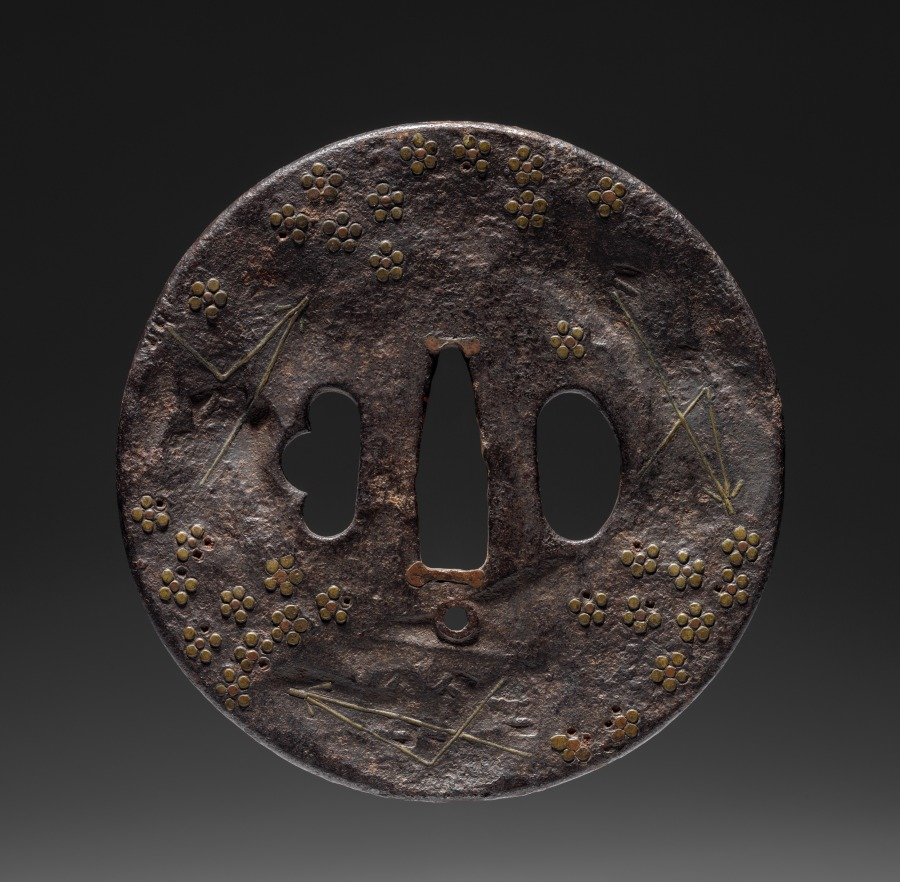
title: Sword Guard (Tsuba)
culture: Japan, possibly Edo period (1615-1868)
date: c. 1615–1868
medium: iron with brass inlay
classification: Arms and Armor